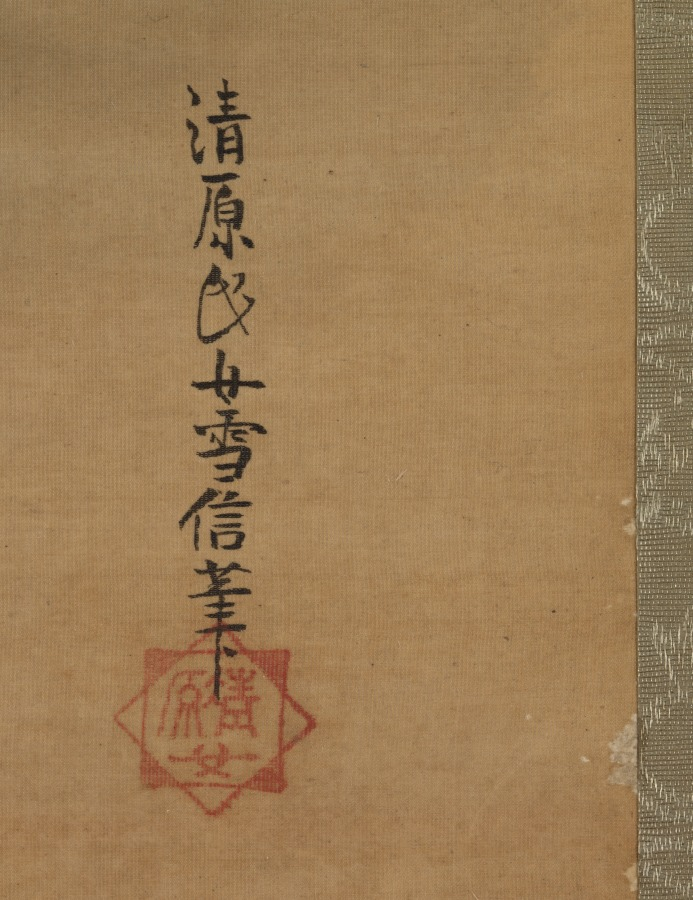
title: Minamoto no Nakakuni Visits Lady Kogō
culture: Japan, Edo period (1615–1868)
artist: Kiyohara Yukinobu (Japanese, 1643–1682)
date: late 1600s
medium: One of a triptych of hanging scrolls; ink and color on silk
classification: Painting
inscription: 款記「清原氏女雪信筆」/「清原女」朱文八角印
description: Kiyohara Yukinobu was one of Japan's earliest and most talented female painters. Kiyohara preferred Japanese-style painting techniques and subjects. Her work depicts the scenery and history of her native land. In addition to the tonalities of ink, she applied a delicate range of colors that help identify the seasons, an important theme in Japanese life and culture.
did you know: This day-lit spring scene is the right part of a triptych presenting an episode from The Tale of the Heike.